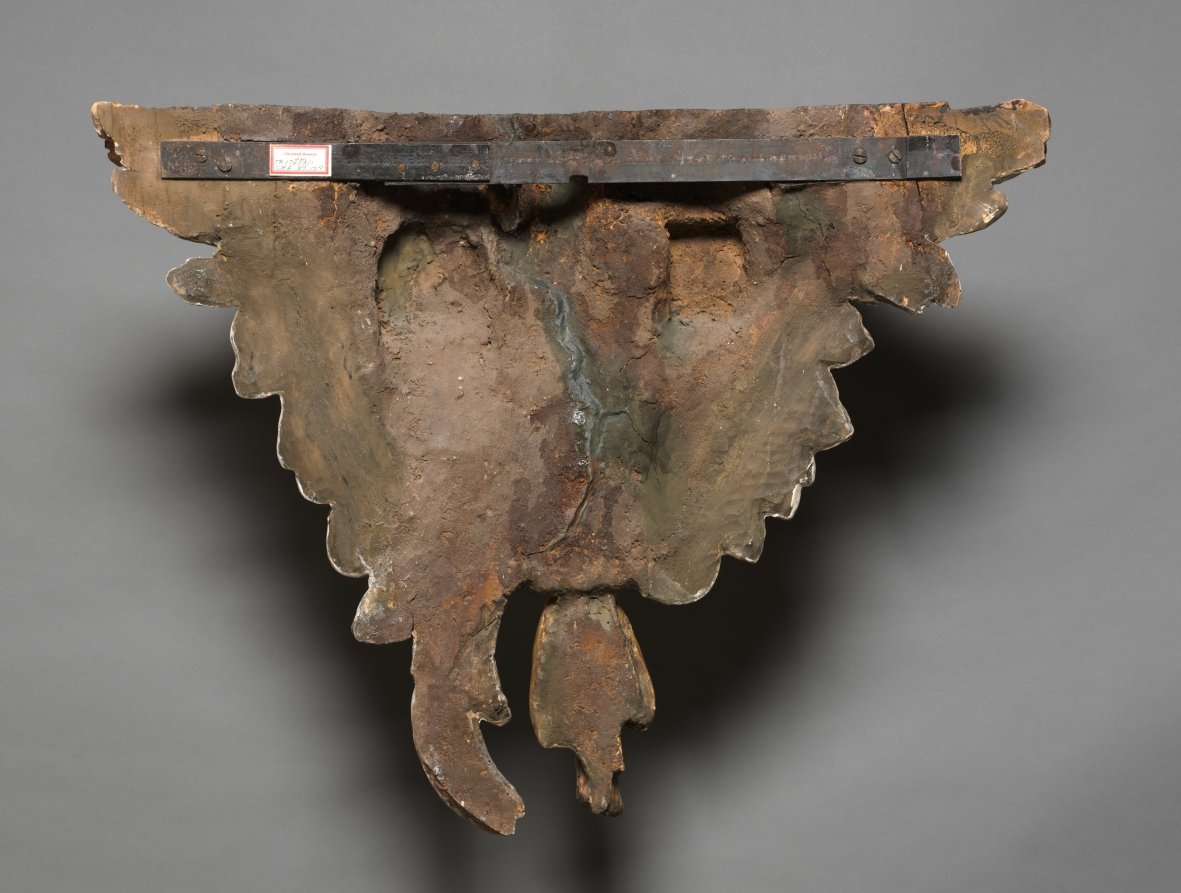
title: Head of an Angel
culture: Germany, 18th century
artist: Joseph Anton Feuchtmayer (German, 1696–1770)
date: c. 1750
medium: painted and gilded wood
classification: Sculpture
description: This decorative bracket was intended to simulate a functional supporting element at the top of a pilaster or beneath an organ loft or pulpit in a church. Joseph Anton Feuchtmayer, a member of a family of artists active in southern Germany and Switzerland, worked in a variety of media including wood and stucco. He often enlisted the aid of assistants, one of whom may have executed this work.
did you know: Part of the angel's wings are made more luxurious by the addition of gold paint, a process called "gilding."